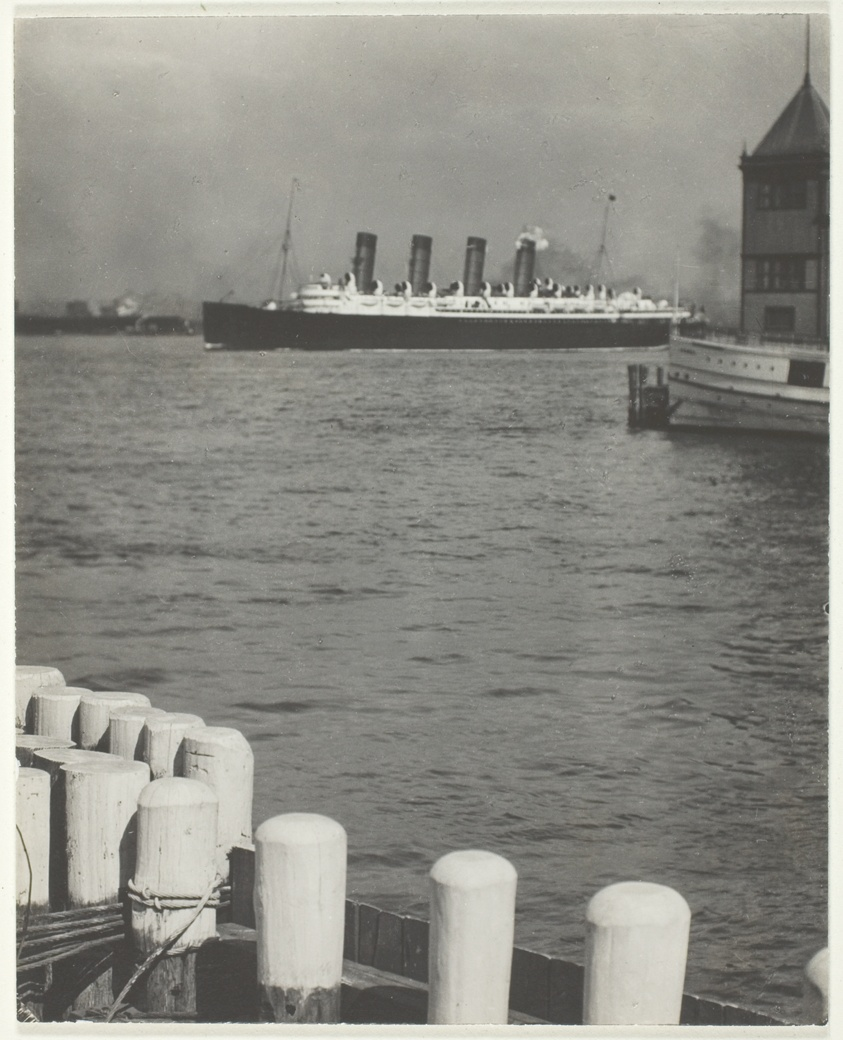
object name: Photograph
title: Outward Bound, The Mauretania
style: Pictorialism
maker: Alfred Stieglitz (American, 1864–1946)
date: 1910, printed 1918/32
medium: Gelatin silver print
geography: United States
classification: gelatin silver (developing-out-paper) pr; photographic process; photography; photograph